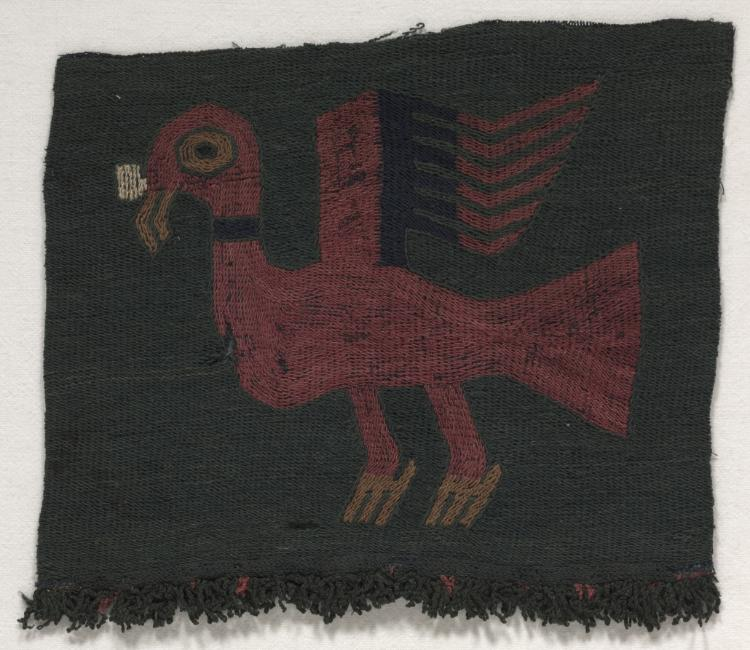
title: Embroidered Fragment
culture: Peru, South Coast, Paracas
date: c. 650–100 BCE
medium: wool embroidery on wool tabby ground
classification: Embroidery